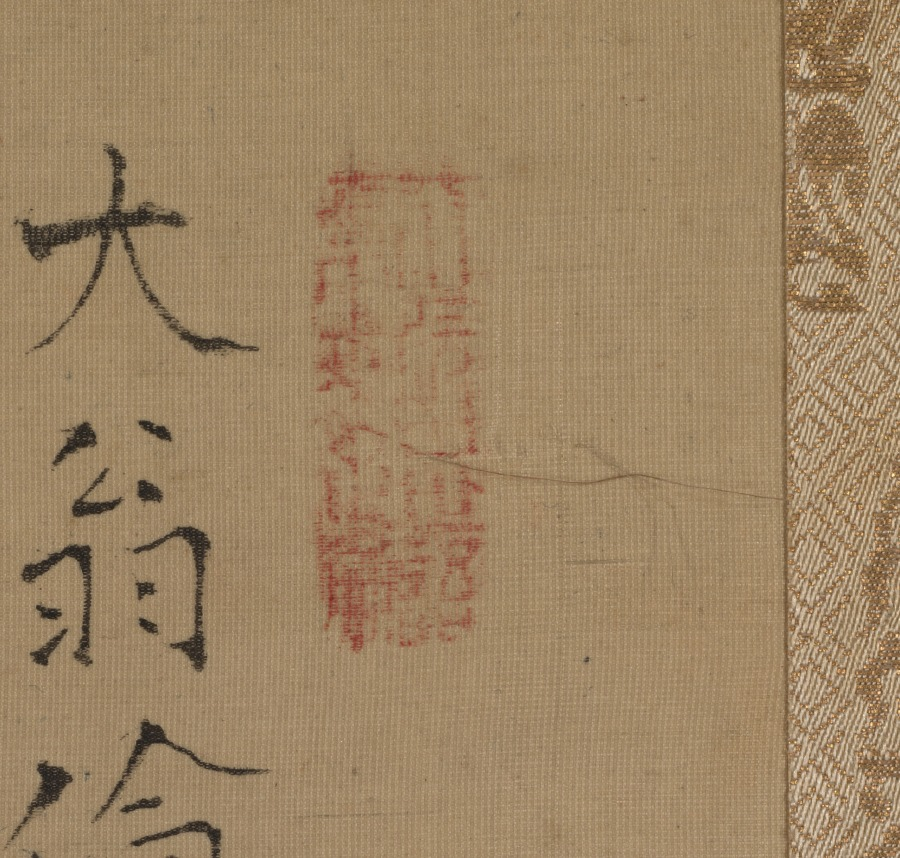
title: Portrait of Samurai-Official: Hirai Rinsei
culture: Japan, Edo period (1615–1868)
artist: attributed to Tsukioka Settei (Japanese, 1710–1786)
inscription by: Jogen (Japanese)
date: 1776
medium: hanging scroll; ink and color on silk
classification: Painting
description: In this pair of figure paintings, the artist provided generational portraits of two clan leaders from the Hirai family, accompanied by lengthy inscriptions in a distinctive calligraphic style from separate scholar-officials.